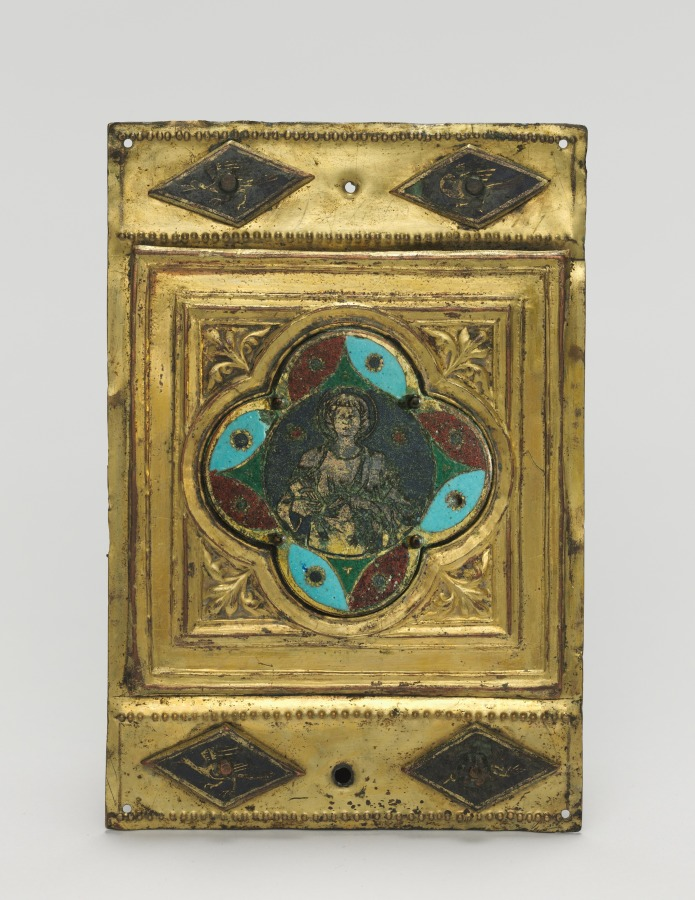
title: Set of Four Ornamental Plaques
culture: Italy, Tuscany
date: c. 1380–1400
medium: champlevé enamel, glass paste stones, and gilding on copper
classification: Enamel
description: These plaques appear to have been part of a larger ensemble forming a band of decoration affixed to a church altar. Each plaque is decorated in multiple techniques-embossing, engraving, enameling, and gilding-to create a sumptuous visual effect.